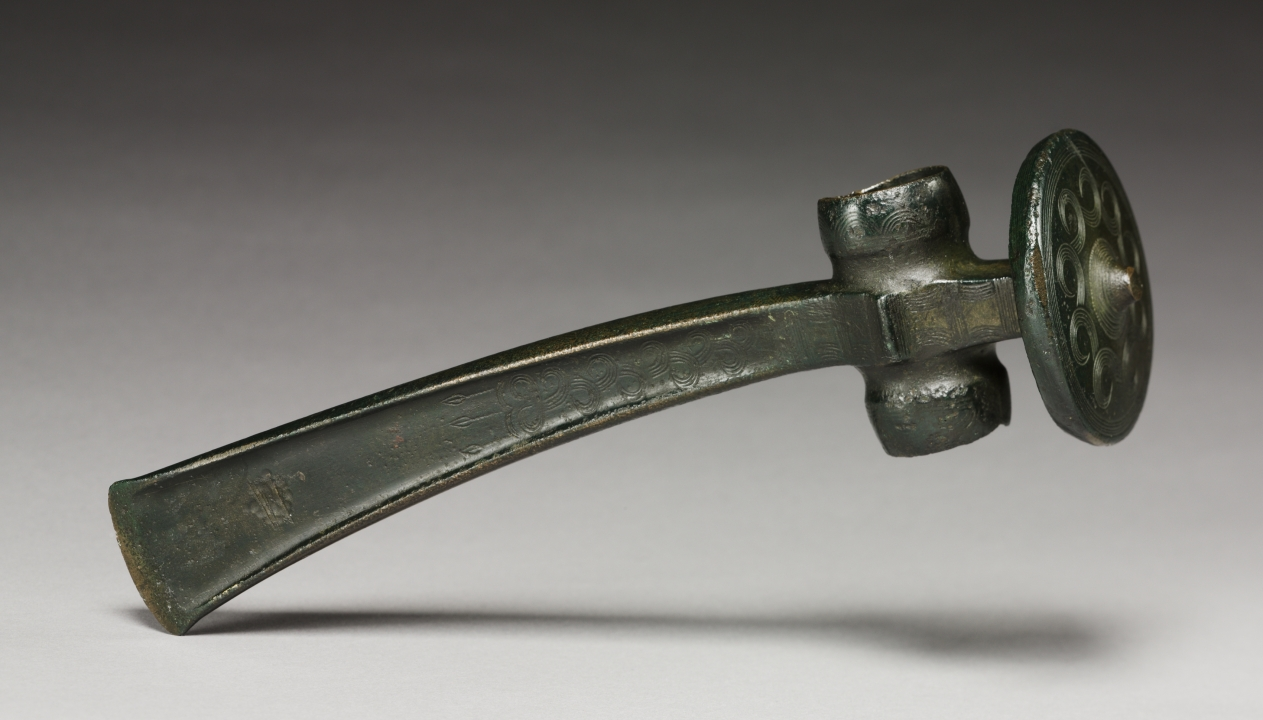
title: Battle Axe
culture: Hungary, Bronze Age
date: c. 1500 BCE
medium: bronze, solid-cast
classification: Metalwork